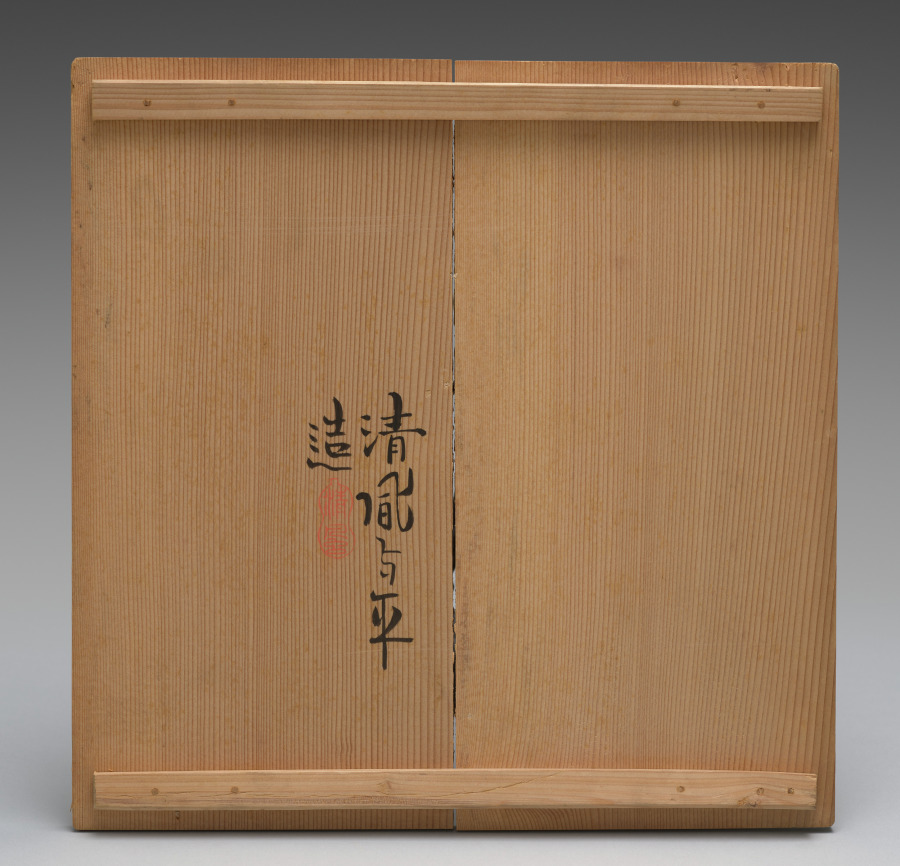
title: Nesting Bowls with Daoist Immortals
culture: Japan, Meiji period (1868–1912)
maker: Seifū Yohei III (Japanese, 1851–1914)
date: 1893–1914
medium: Set of three bowls; porcelain with underglaze blue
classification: Ceramic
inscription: 清風与平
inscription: 大日本清風造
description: Yohei III was capable of ink painting–like compositions in underglaze blue, as well as more decorative ones like that on this set of three nesting bowls. Bowls with very similar designs in five colors were produced in the reign of the Wanli emperor (r. 1572–1620) during the Ming dynasty, and Yohei must have had direct access to one of these or to a close copy. A scene of Daoist immortals is presented on the bowls. On each one, the ground plane is defined with a blue wash. Four lanterns are evenly spaced around the bowl. Two are flanked with linked-piece metalwork banners of the seven treasures. The alternate altars are adorned with textile banners. In between them are four immortals, each standing beneath a tree with small plants surrounding his feet. Two of the immortals hold fruit on a tray. Another carries an elixir-filled ewer and a willow branch. The fourth holds a swastika (manji), here an auspicious symbol, and a flower. Curiously, the inscription inside each footring reads “Made by Seifu of Great Japan,” in emulation of the dynasty and reign inscriptions that appear on Chinese ceramics; however, one can also see through the translucent glaze another inscription, “Seifu Yohei,” written in large characters within a double band of blue on the largest bowl.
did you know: In the bottom of each bowl is a scene of two robed immortals who appear to stand on a precipice in a mountainous landscape high in the clouds, with celestial orbs over their heads.